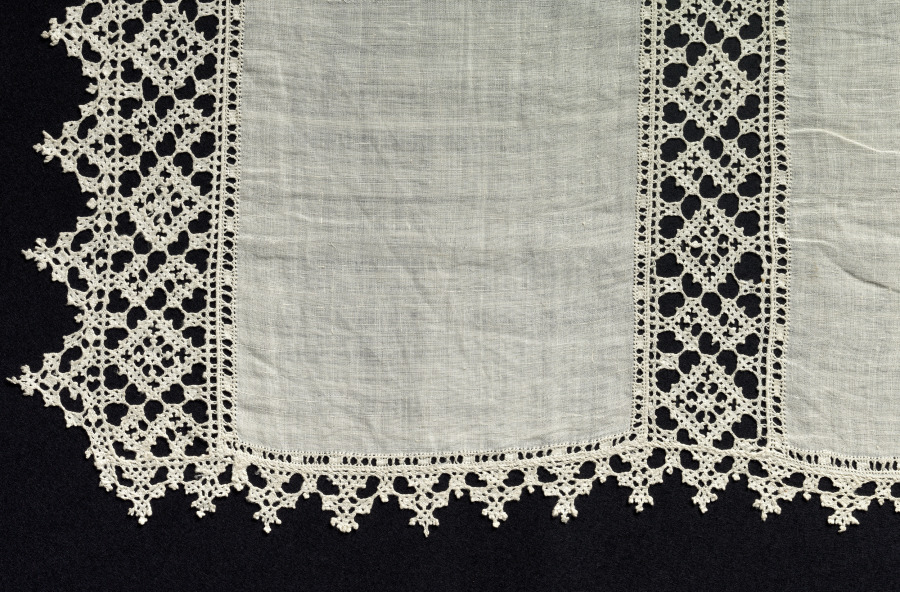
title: Lace Cloth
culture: Italy, Venice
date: 1540–60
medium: Bobbin lace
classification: Lace